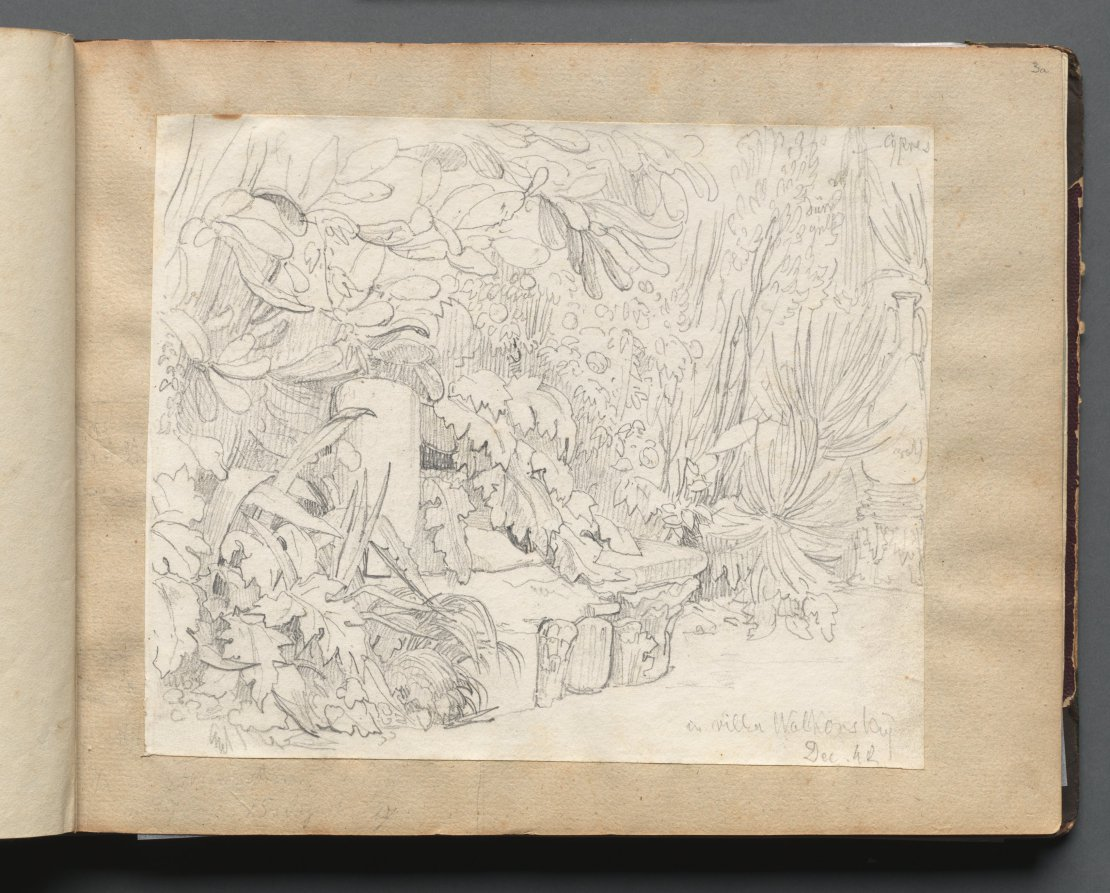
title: Album with Views of Rome and Surroundings, Landscape Studies, page 03a: In villa Walkonsky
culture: Germany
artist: Franz Johann Heinrich Nadorp (German, 1794–1876)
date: c. 1830s-70s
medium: graphite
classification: Bound Volume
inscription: "in villa walkonsky Dec. 42"